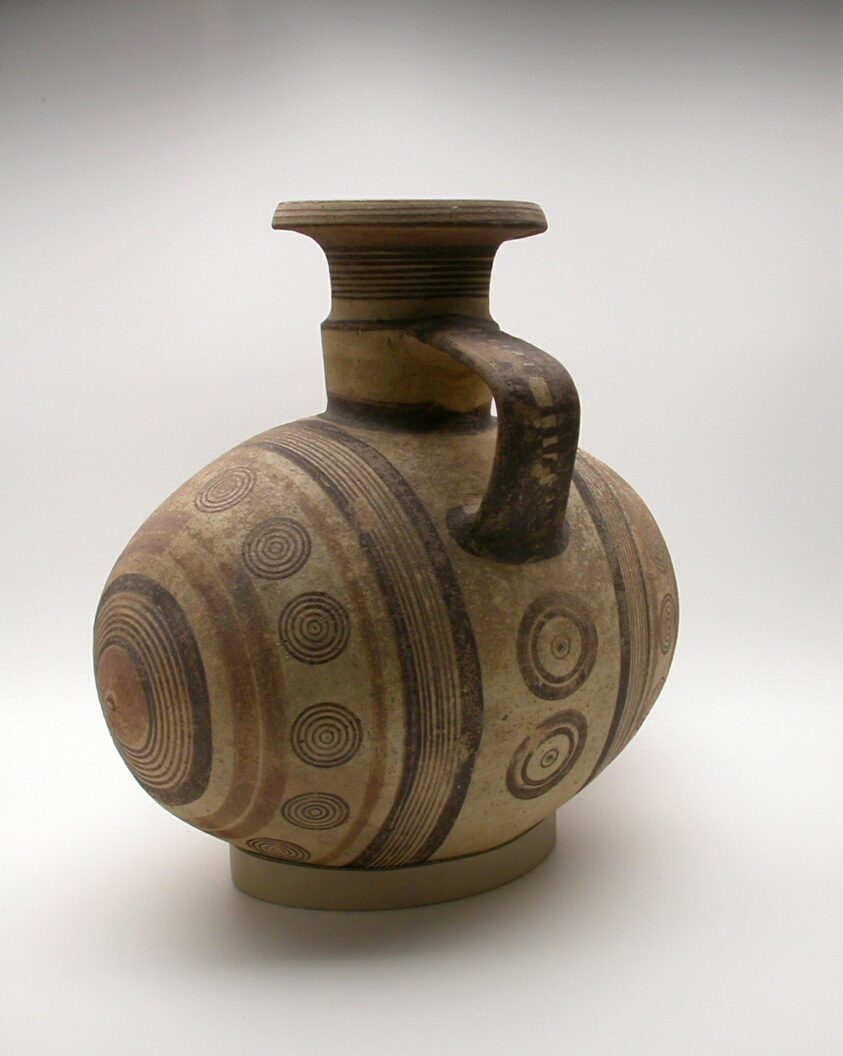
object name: Vessel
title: Jug in the Shape of a Barrel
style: white-ground, early iron age, iron age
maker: Cypriot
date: 750-550 BCE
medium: terracotta, bichrome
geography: Cyprus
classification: vessel; earthenware; ceramics; ancient art